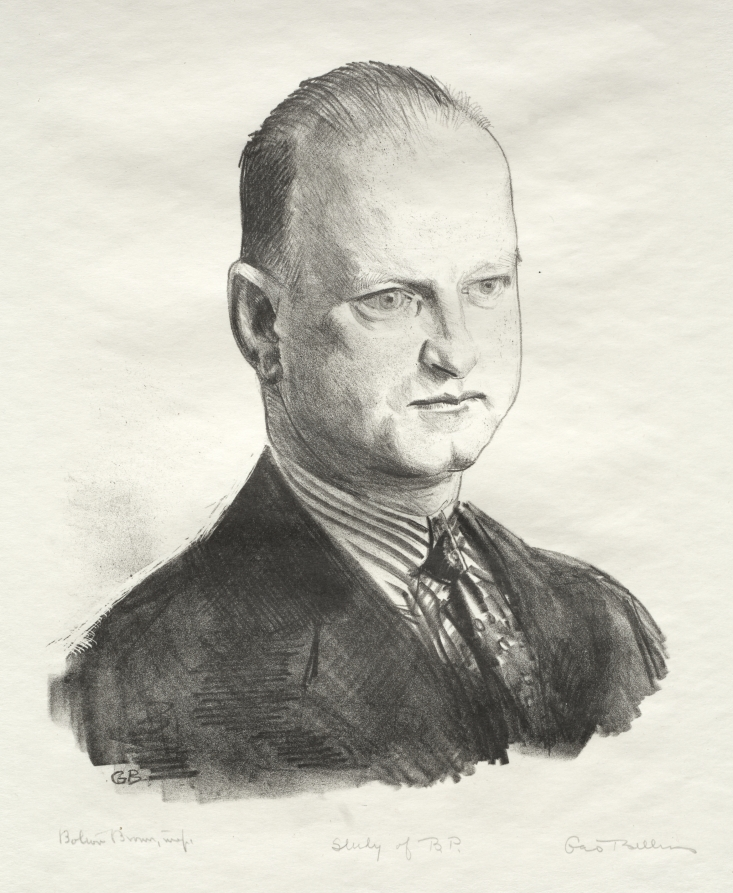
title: Study of B. P.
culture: America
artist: George Bellows (American, 1882–1925)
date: 1924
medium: lithograph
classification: Print